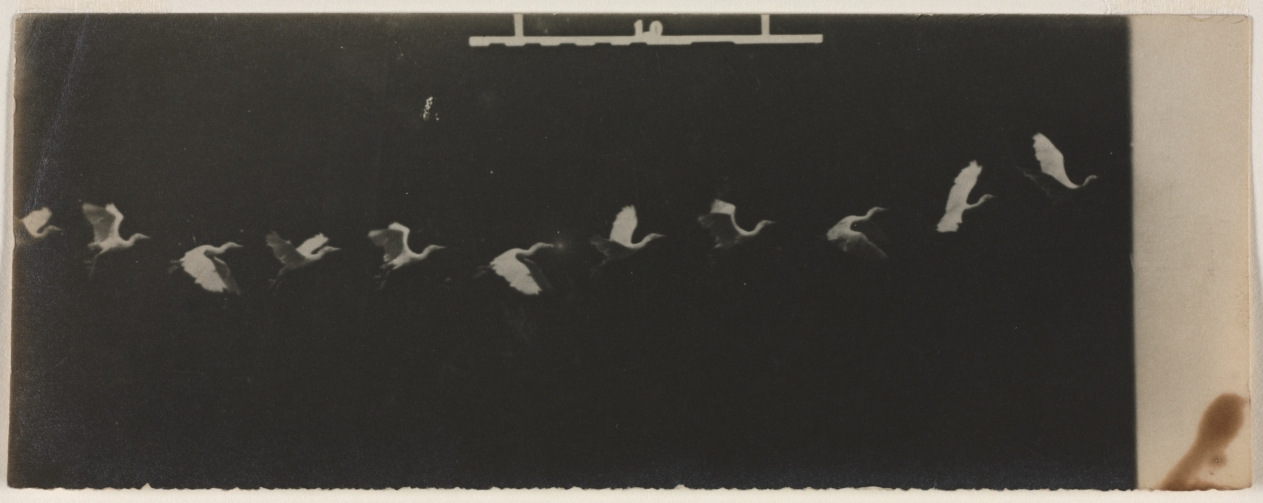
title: Chronophotograph of a Flying Heron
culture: France, 19th century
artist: Étienne-Jules Marey (French, 1830–1904)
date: c. 1883–87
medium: gelatin silver print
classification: Photograph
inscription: Written in pencil on verso: "VII"